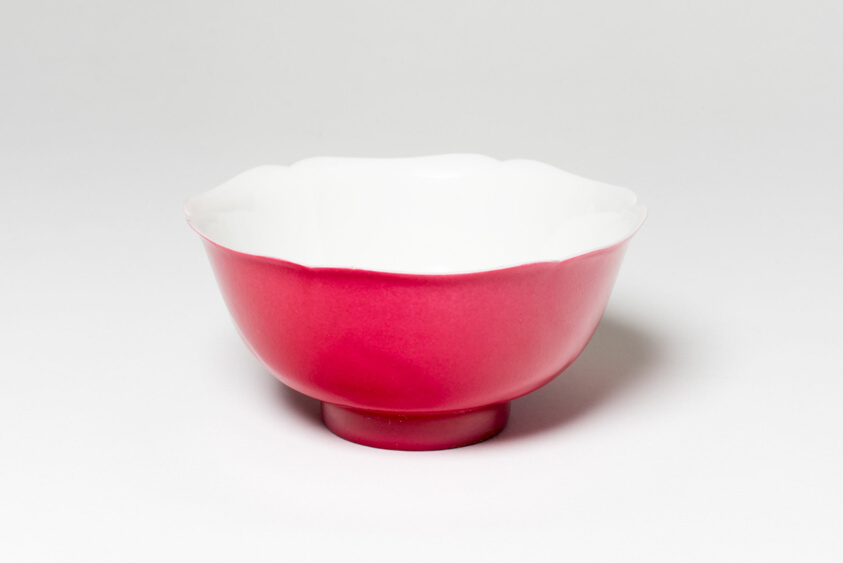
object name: Vessel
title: Bowl with Foliate Rim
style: Chinese (culture or style)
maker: China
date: Qing dynasty (1644–1911), late 18th/19th century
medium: Porcelain with ruby pink glaze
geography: China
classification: bowl; porcelain; dish (vessel); asian art; ceramics; vessel